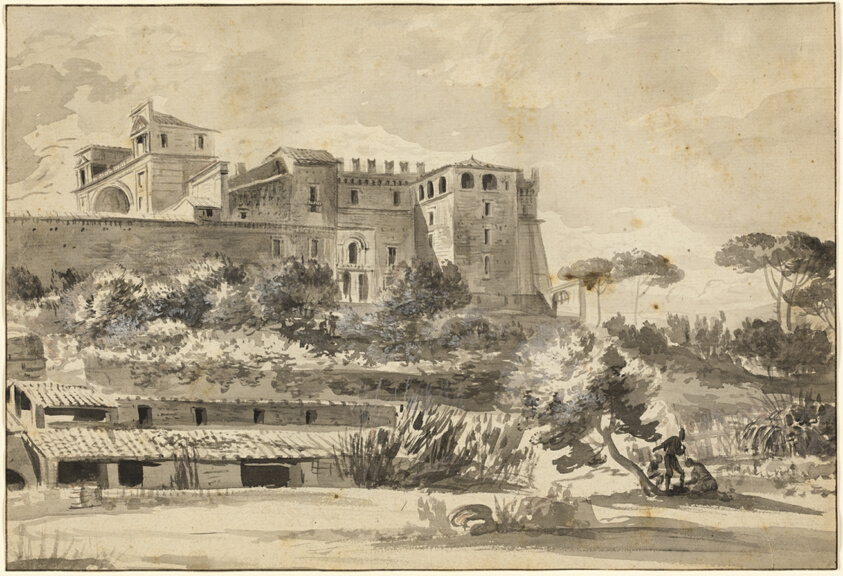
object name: Drawing and Watercolor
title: View of an Italian Villa and Gardens (the Belvedere of the Vatican)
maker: Jean Jacques de Boissieu (French, 1736-1810)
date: 1765/66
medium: Brush and gray wash heightened with white gouache, over traces of black chalk, on ivory laid paper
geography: France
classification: ink or chalk wash; drawings (visual works); prints and drawing